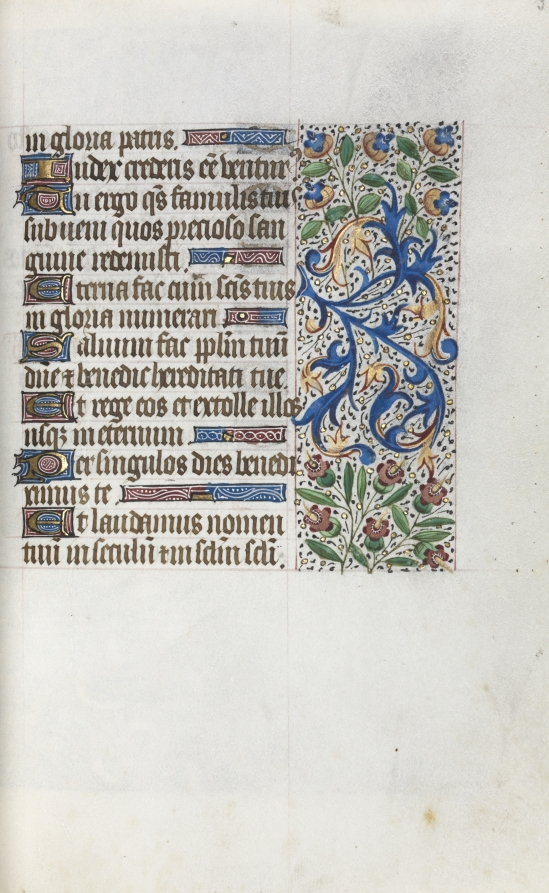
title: Book of Hours (Use of Rouen): fol. 38v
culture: France, Rouen, 15th century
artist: Master of the Geneva Latini (French, active Rouen, 1460–80)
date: c. 1470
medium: ink, tempera, and gold on vellum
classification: Bound Volume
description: In the late 1400s and early 1500s Rouen was an established and important center of book production. The city’s cathedral had a wealthy chapter that spent large sums of money to commission books and to maintain its extensive library. The stationers and booksellers would have likely been concentrated in or near the cathedral precinct. This artist, named after a manuscript now in Geneva, was Rouen’s principal illuminator during the second half of the 1400s.